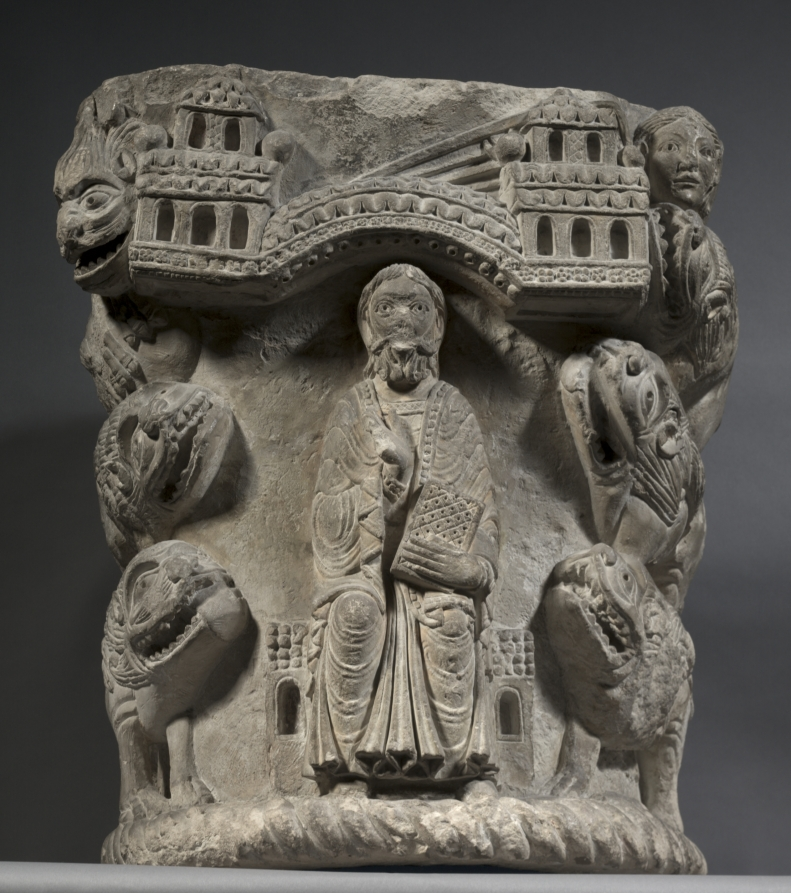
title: Daniel in the Lion's Den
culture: France, Saint-Aignan-sur-Cher, 12th century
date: c. 1125–50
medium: limestone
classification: Sculpture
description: According to the Old Testament, Daniel was cast into a lion’s den as punishment for his belief in a single god, but he was miraculously delivered from harm on account of his faith. This story is related here, with Daniel flanked by lions and the angel sent by God to save him. Together with other decorated capitals, this imposing work of Romanesque sculpture once decorated the interior of the church of Saint-Aignan-sur-Cher, a city in central France.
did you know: During the 12th century, churches used images to teach the faithful who were illiterate. While Daniel lived before Jesus, he is depicted holding a bible, alluding to the continuity between the Old and New Testaments.